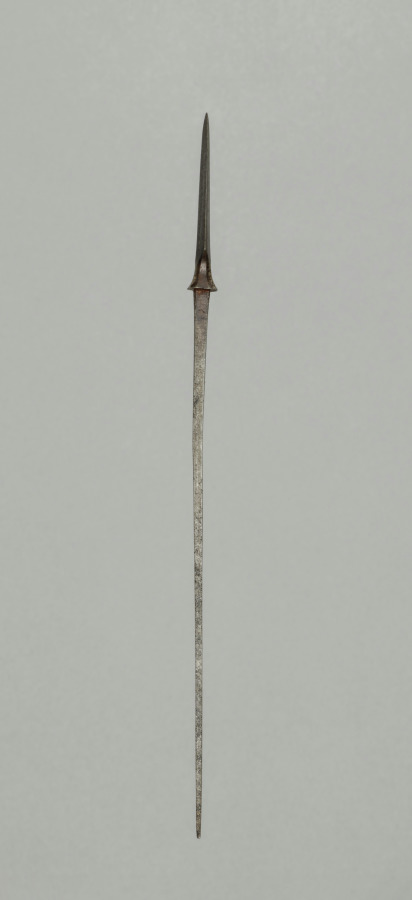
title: Arrow Point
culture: Japan, Edo period (1615–1868)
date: 1700s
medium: steel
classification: Arms and Armor